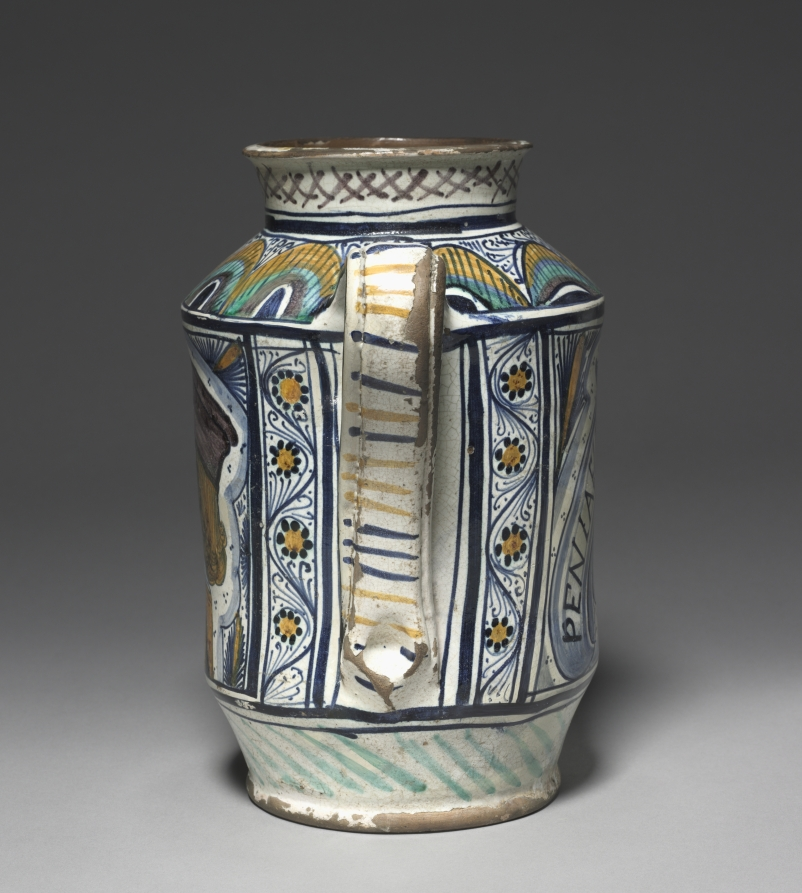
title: Pharmacy Jar (Albarello)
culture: Italy, Florentine region, Cafaggiolo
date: c. 1475–80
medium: tin-glazed earthenware (maiolica)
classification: Ceramic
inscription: in ribbon scroll on back: PENIAELFINE.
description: Storage jars that lined the shelves of Renaissance pharmacies often held medicinal herbs, spices, and ointments. Their shape made them easy to grasp while the flared lip allowed apothecaries to seal off the contents with parchment or cloth secured by a string. A scroll on the back of this vessel indicates that it may have once held a peony compound.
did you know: At various points in history, medicinal peony compounds have been prescribed for dizziness, weakness, hysteria, jaundice, and kidney stones.